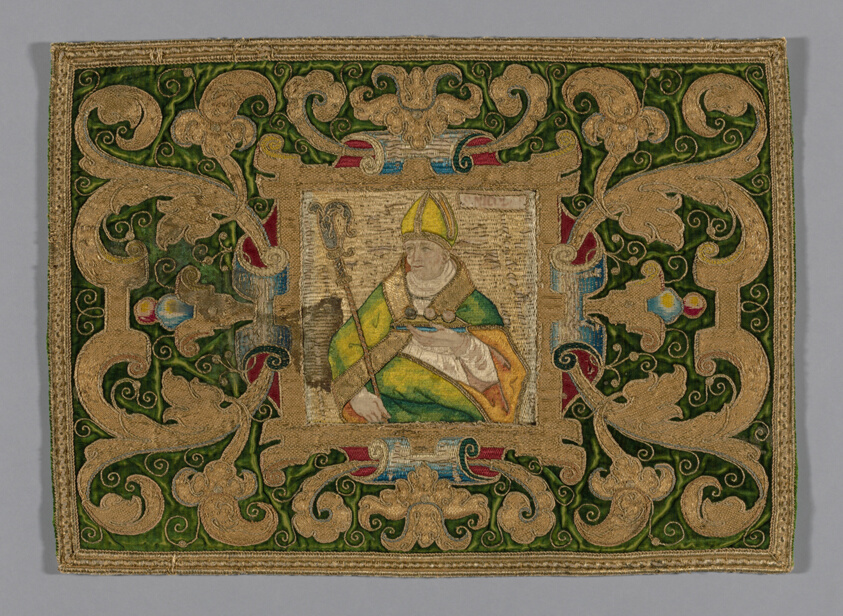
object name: Textile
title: Fragment (From a Chasuble)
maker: Spain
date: 17th century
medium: Green velvet with figures of two Saints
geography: Spain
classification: textile; liturgical; weaving; costume